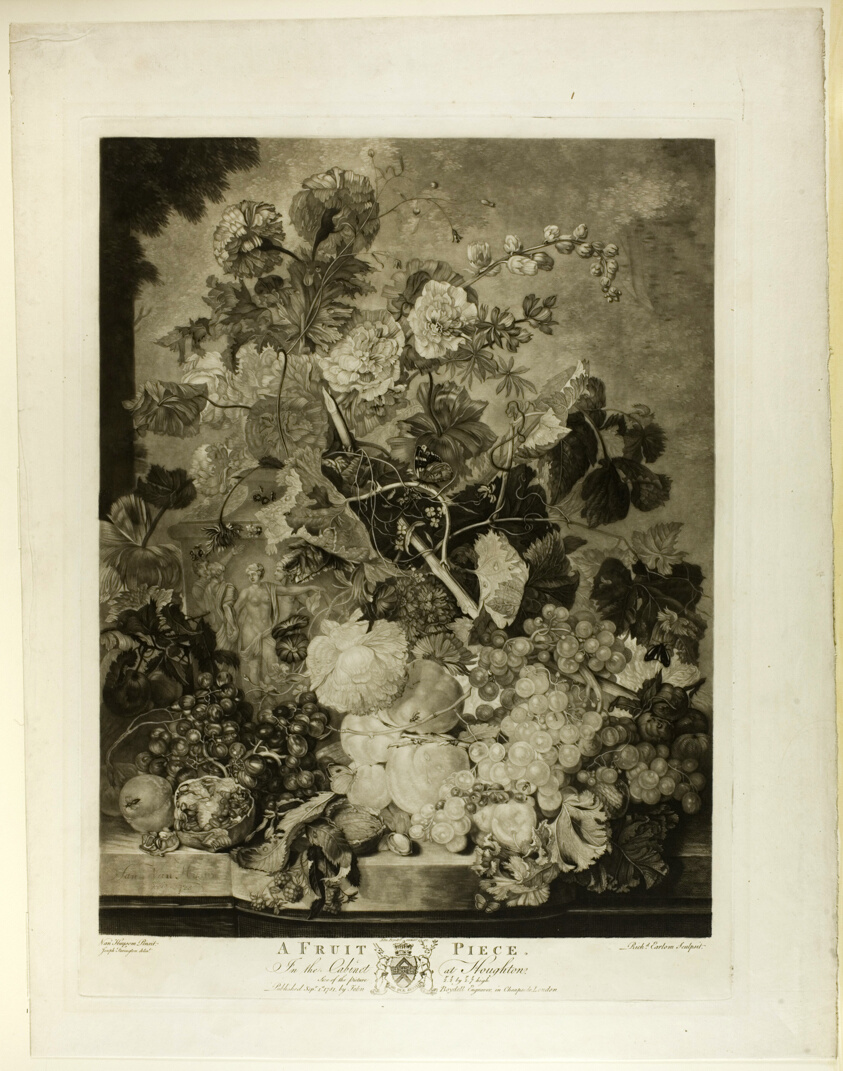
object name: Print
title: A Fruit Piece, from The Houghton Gallery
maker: Richard Earlom (British, 1743-1822); After Jan van Huysum (Dutch, 1682-1749)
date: 1781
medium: Mezzotint with etching, with engraved inscription, in black on ivory wove paper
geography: England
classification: mezzotint; print; prints and drawing